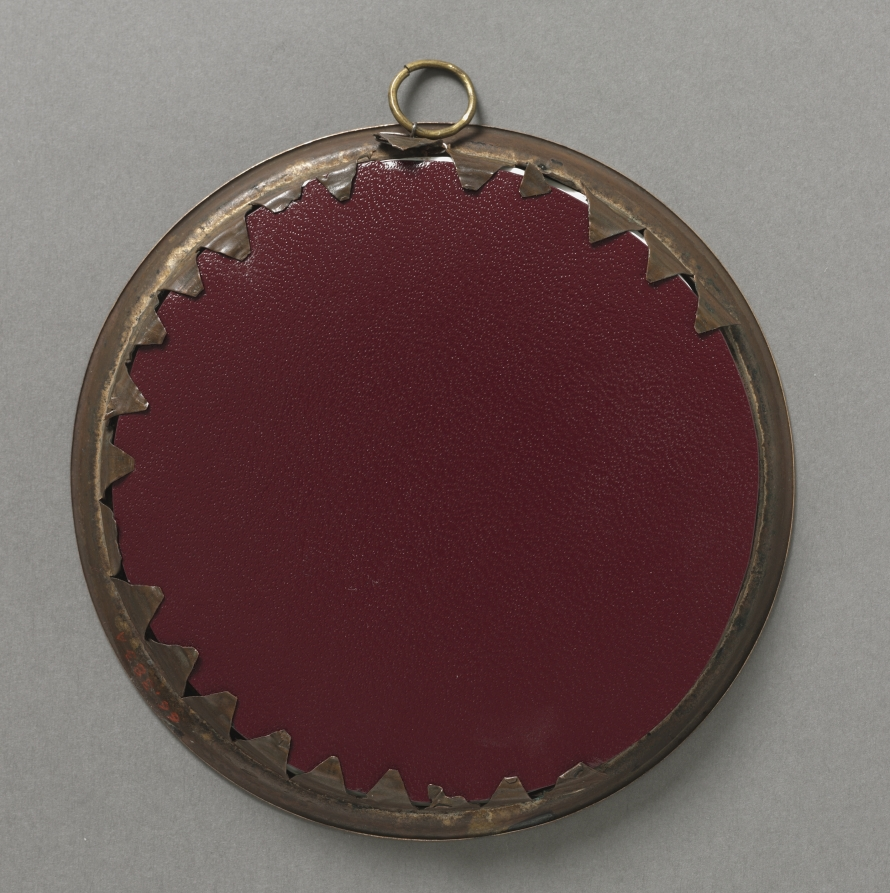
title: Portrait of Prince Alexander Bezborodko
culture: France, 18th century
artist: Pierre-Charles Cior (French, 1769–1840)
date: mid- to late 1700s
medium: watercolor on ivory in a 19th-century gilt metal frame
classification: Portrait Miniature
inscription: signed left: Cior.p.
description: This portrait of Alexander Bezborodko, chancellor of Russia from 1747 to 1799, was painted by Pierre-Charles Cior in the final years of the 18th century. Previously a foreign minister for Catherine the Great, the prince became grand chancellor of the Russian empire upon the 1797 accession to the throne of Catherine's son Paul I. In this position, Bezborodko reformed the post office, regulated the banking systems, and constructed roads. Here he is shown dressed in a blue uniform with the blue sash of the Order of Saint Andrew over the red and black sash of the Order of Saint Vladimir. Pinned over his left breast are stars and badges of the Order of Saint Andrew as well as the Maltese cross. Around his neck is the decoration of the Order of Saint Alexander Nevsky, which is encrusted with diamonds. Bezborodko holds a miniature of Paul I in his right hand while resting his left arm on a leopard pillow. He poses in front of a lavish green curtain and classical colonnade. Trained under the Spanish miniaturist Juan Bauzil, Cior became the official miniaturist of the king of Spain and a court painter in Russia, likely creating this portrait during his extended stay in Saint Petersburg. His depiction of Bezborodko is unusual; when compared to the rest of the prince's body, his legs appear diminutive, as if the artist failed to leave enough room for them when painting. This miniature dates from early in Cior's career, and Bezborodko's small lower body may be a result of the immature artist experimenting with composition. The tiny portrait of Paul I that Bezborodko holds in his right hand relates to a late 18th-century oil painting of the king attributed to A. F. Mitrokhin. Cior's inclusion of the miniature of Paul I demonstrates how miniatures were handled by their owners and how they could be used in portraits to lend credibility or show allegiance.